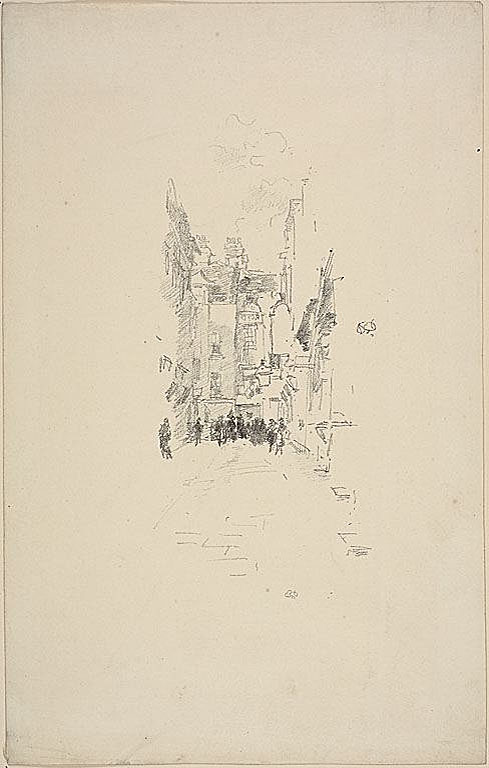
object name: Print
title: Little Court, Cloth Fair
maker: James McNeill Whistler (American, 1834-1903)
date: 1887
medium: Transfer lithograph in black on ivory wove paper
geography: United States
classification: transfer lithograph; lithograph; print; prints and drawing; paper